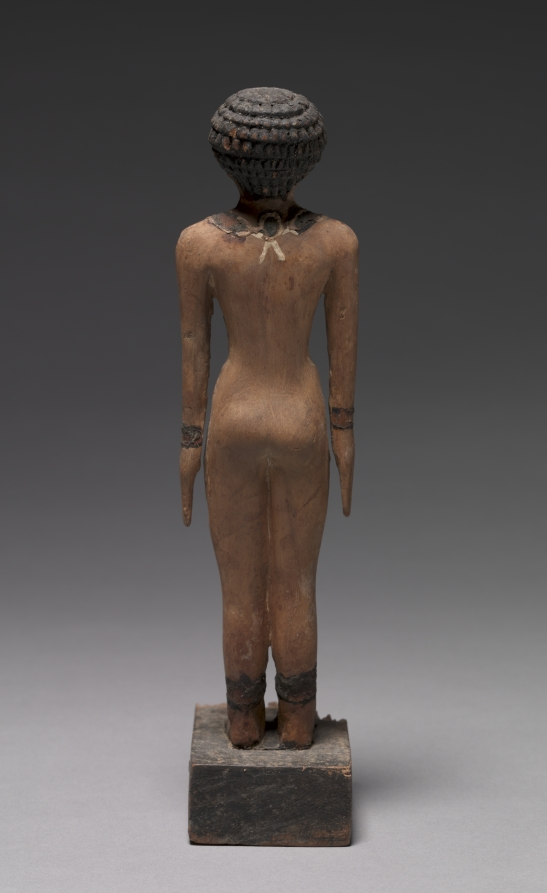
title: Female Statuette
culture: Egypt, Middle Kingdom (2040–1648 BCE), Dynasties 11–12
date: c. 2040–1859 BCE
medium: painted wood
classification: Wood